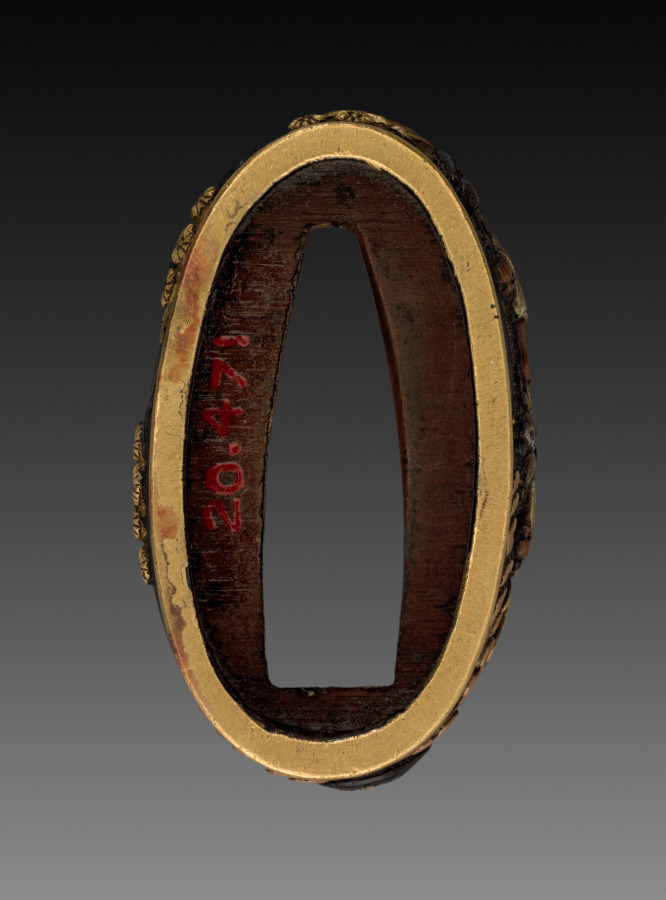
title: Sword-Hilt Collar (Fuchi)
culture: Japan, Edo period (1615–1868)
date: 1700–1850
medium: shakudo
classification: Arms and Armor